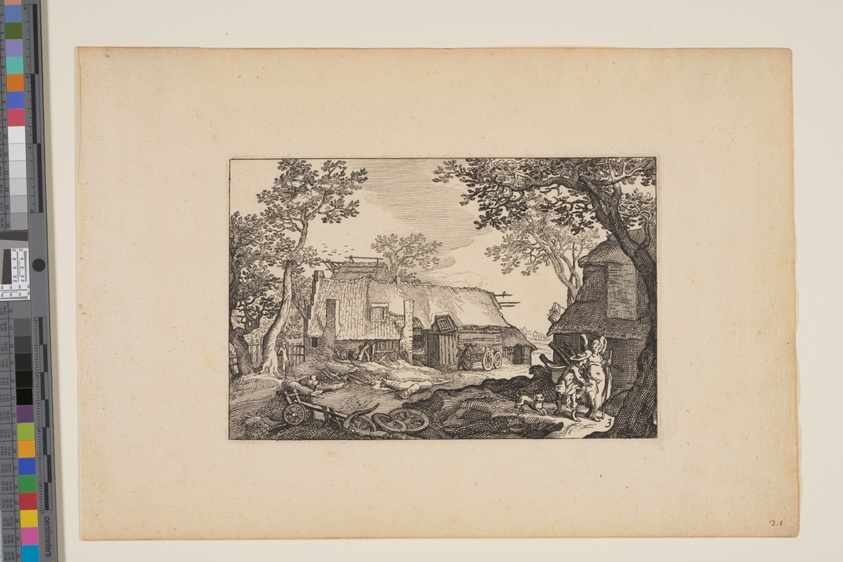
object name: Print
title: Tobias and the Angel, from Landscapes (Verscheyden aerdige Lanthuysen...)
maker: Claes Jansz. Visscher (Netherlandish, c. 1550–c. 1612); after Abraham Bloemaert (Dutch, 1566–1651)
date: 1620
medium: Etching on ivory laid paper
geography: Netherlands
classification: print; paper; prints and drawing; etching